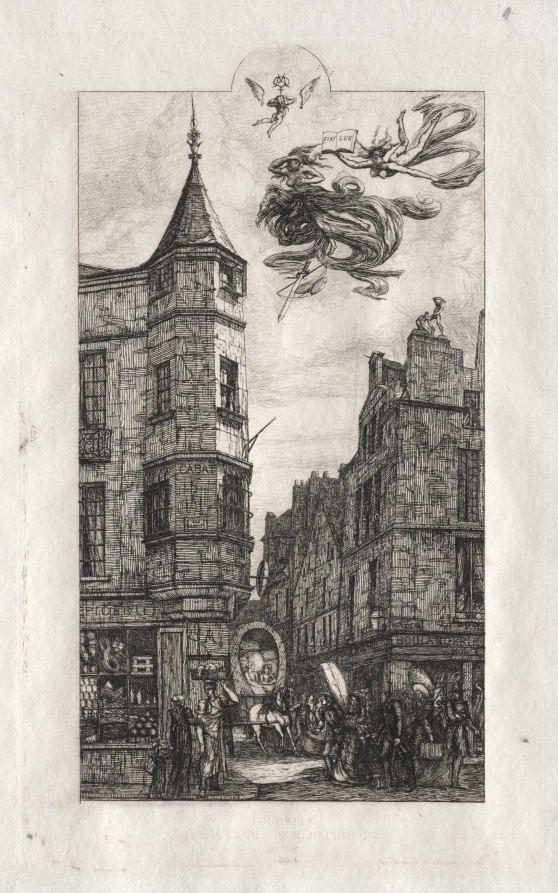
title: Etchings of Paris: Tourelle, rue de l'Ecole de Médicine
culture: France, 19th century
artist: Charles Meryon (French, 1821–1868)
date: 1861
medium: etching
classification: Print